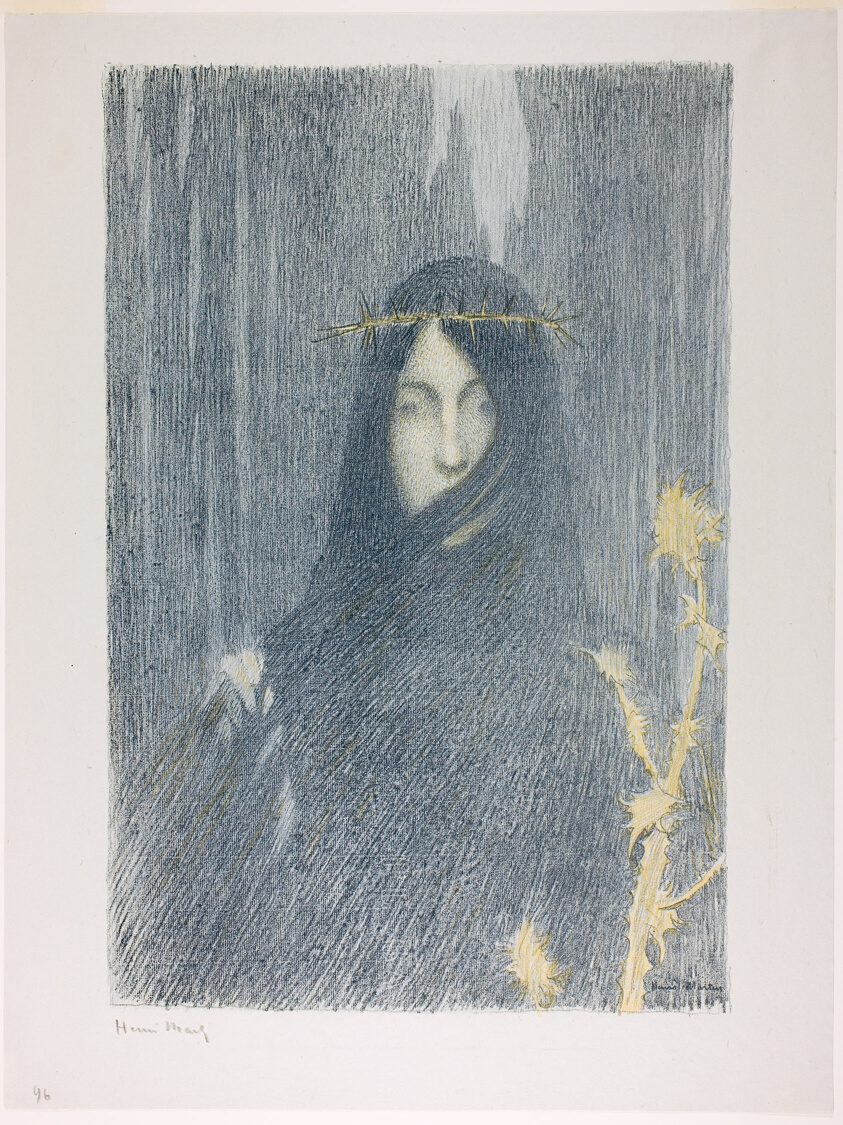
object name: Print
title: Silence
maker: Henri Martin (French, 1860-1943); published by Ambroise Vollard (French 1867-1939)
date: 1894/97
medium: Color transfer lithograph from three stones on grayish-ivory China paper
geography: France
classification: print; prints and drawing